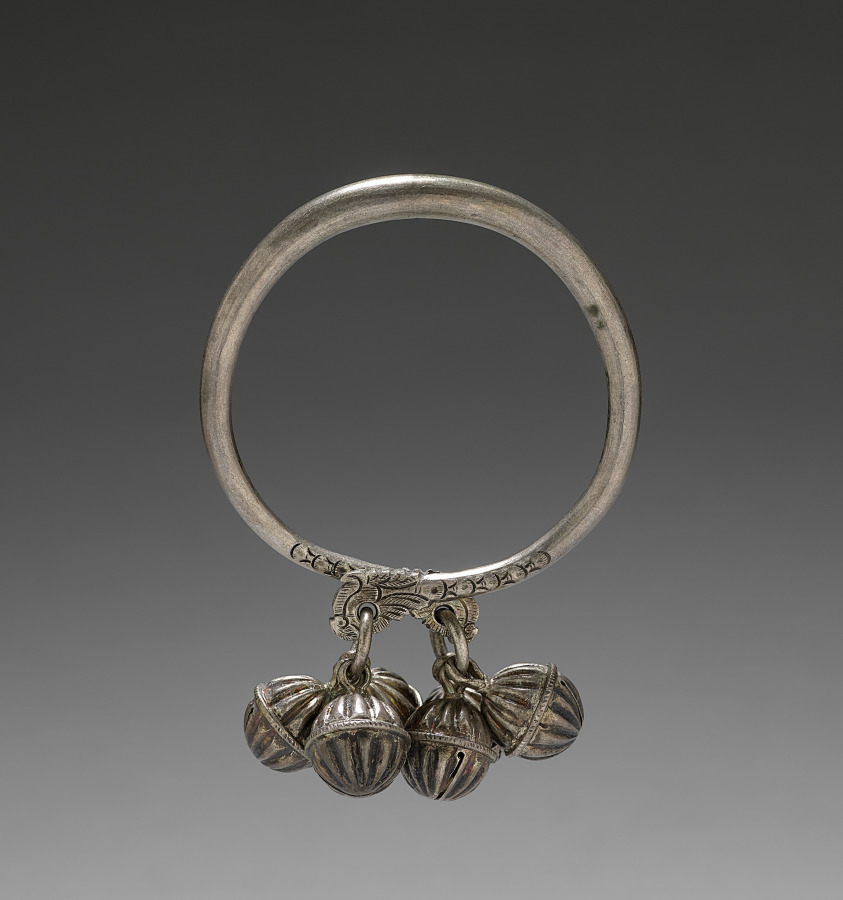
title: Bracelet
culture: India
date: 1800s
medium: silver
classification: Jewelry